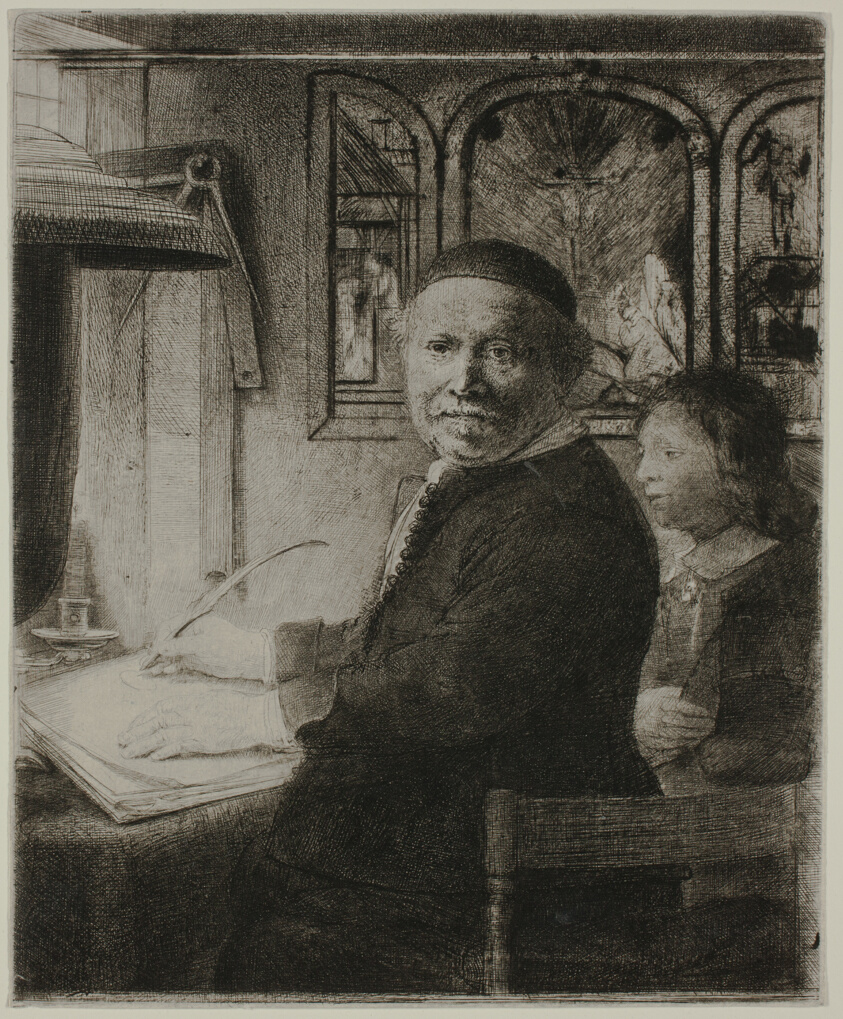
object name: Print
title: Lieven Willemsz van Coppenol, Writing Master: The Smaller Plate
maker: Rembrandt van Rijn (Dutch, 1606-1669)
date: c. 1658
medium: Etching, drypoint, and burin in black on buff laid paper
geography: Holland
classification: etching; print; prints and drawing; paper; drypoint; burin